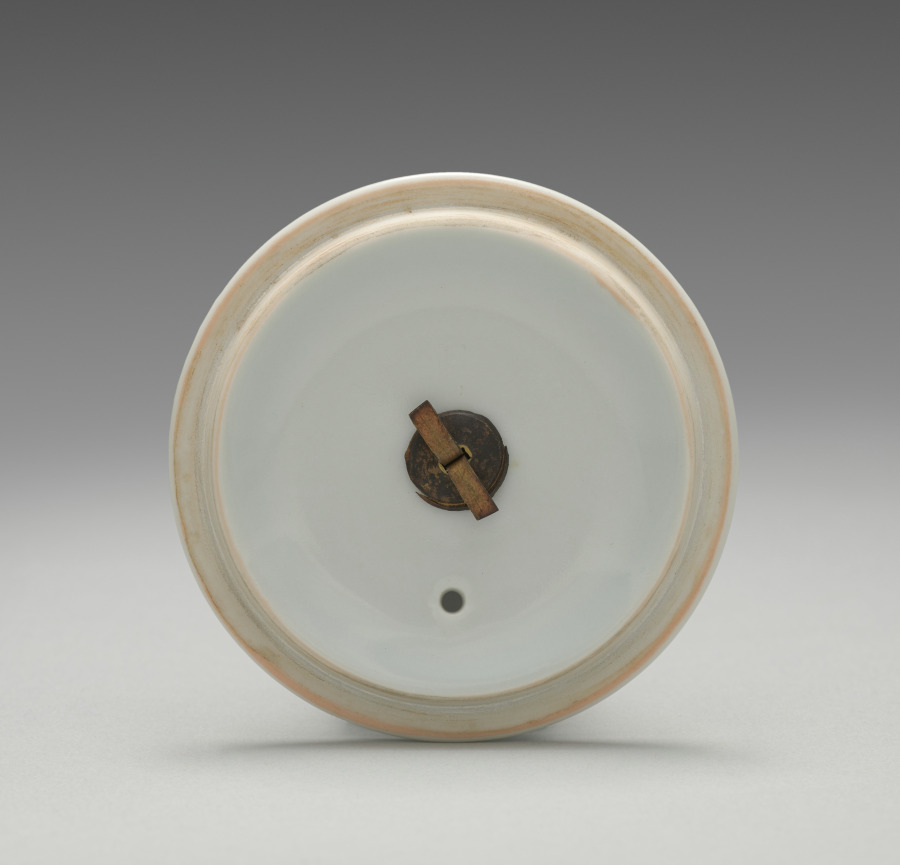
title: Lid for a Teapot with Bamboo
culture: Japan, Taishō period (1912–26)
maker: Seifū Yohei IV (Japanese, 1872–1951)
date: 1914–46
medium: Porcelain with underglaze blue, molded decoration and metal handle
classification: Ceramic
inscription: 清風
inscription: 清風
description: This teapot has a well-balanced design of bamboo in underglaze blue and nyoi staff-head motifs applied to both sides at the shoulder.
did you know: Seifū Yohei IV was the second son of Yohei III.